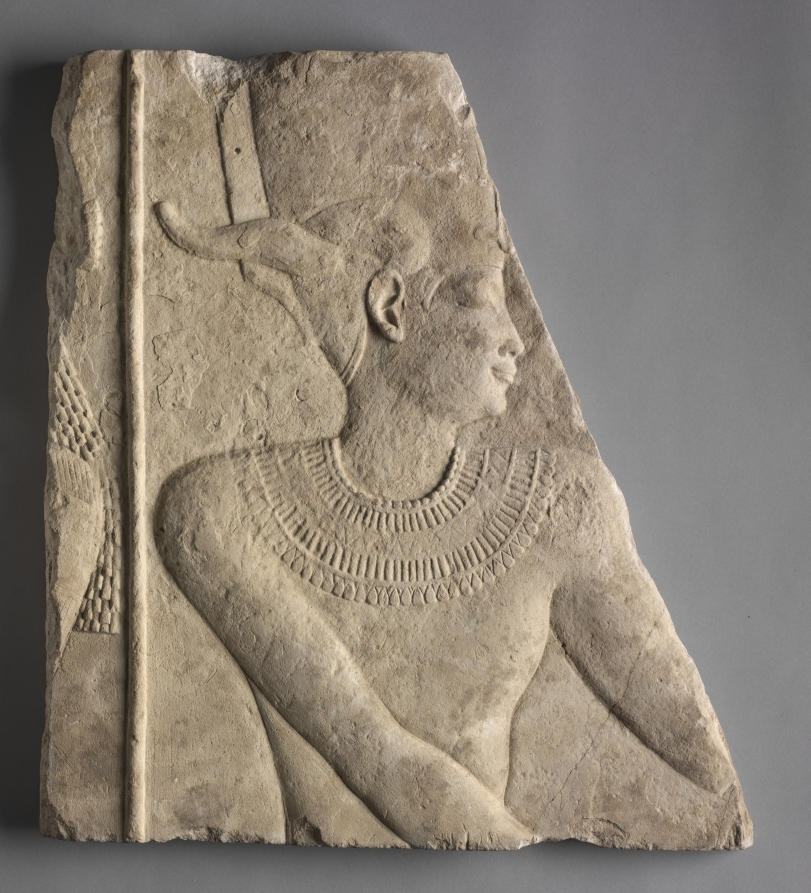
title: Temple Relief of a Deity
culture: Egypt, Late period (715–332 BCE), Dynasty 30–Greco-Roman period (332 BCE–395 CE), Ptolemaic dynasty (305–30 BCE)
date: 360–246 BCE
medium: limestone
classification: Sculpture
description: The almond-shaped eye, snub nose, full cheeks, smiling mouth, and ball.shaped chin are characteristic of Dynasty 30 and the early Ptolemaic Dynasty, when a bolder, fleshier, more three-dimensional style of modeling was introduced. A favorite form of temple decoration during this period was a row of seated deities. This figure was the last in a row of gods facing right, for directly behind him is a dividing line and the slight remains of the vulture headdress, wig, and shoulder of a seated goddess, evidently the last in a row facing the opposite direction. At either end of the complete scene was probably a standing figure of the king presenting offerings.